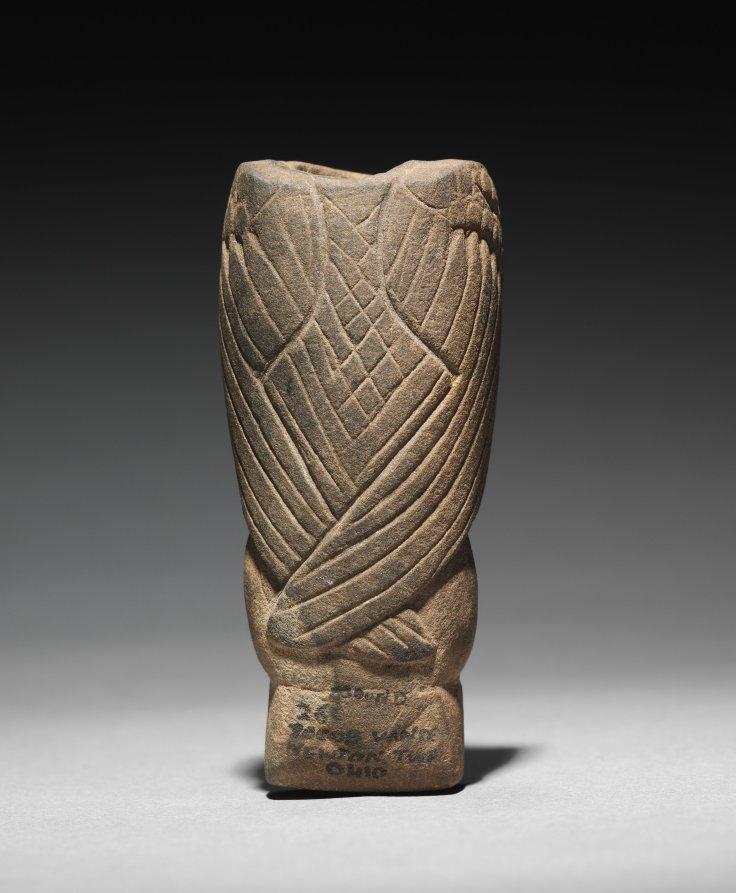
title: Bird Effigy Pipe Fragment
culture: Native North America, Adena people, Vance Mound, Newton Township, Licking County, Ohio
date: 400 BCE–100 CE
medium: sandstone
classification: Sculpture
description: The modest appearance of this small bird-effigy pipe, its head now lost, is misleading—the carving is fine and imagery, complex. The upper part takes the form of a bird’s body, the wings folded over the back. The section beneath the bird’s breast, intact but difficult to read, may depict a human torso with a pronounced navel and upraised forearms and hands, the palms facing outward. If so, one creature could be carrying or transforming into the other. The pipe was created by an artist of the ancient Adena people of southern Ohio. Smoke traveled through an interior channel to the mouthpiece, a small hole on the underside.